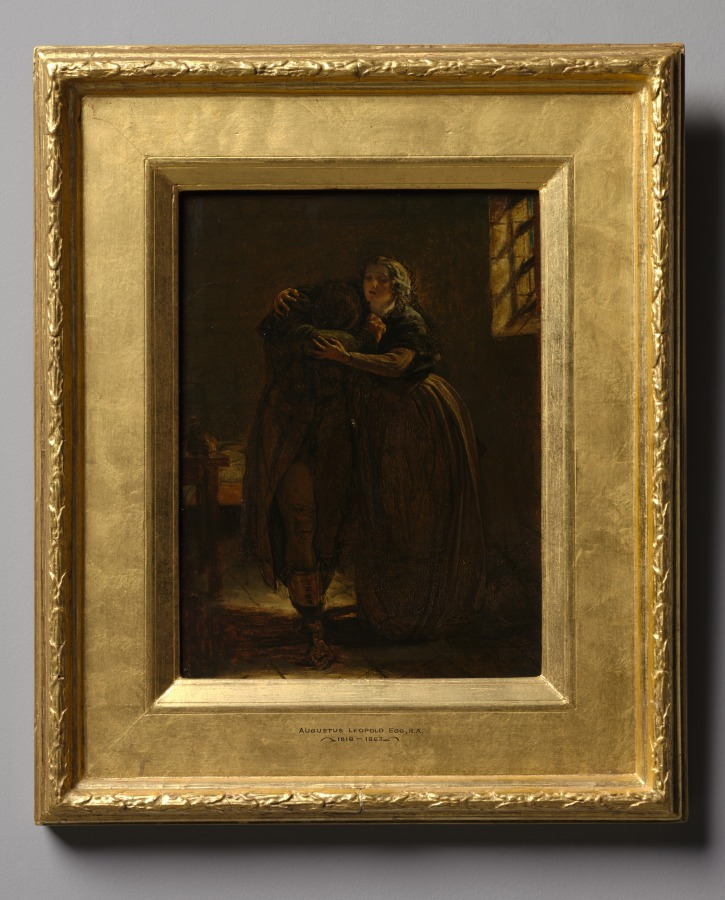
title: Study for "Come Rest in this Bosom my own Stricken Dear"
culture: England, 19th century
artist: Augustus Leopold Egg (British, 1816-c. 1863)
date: 1800s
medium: oil on board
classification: Painting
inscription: hand-written label affixed to back: "Moore's [Irish] songs... Come rest on this bosom."